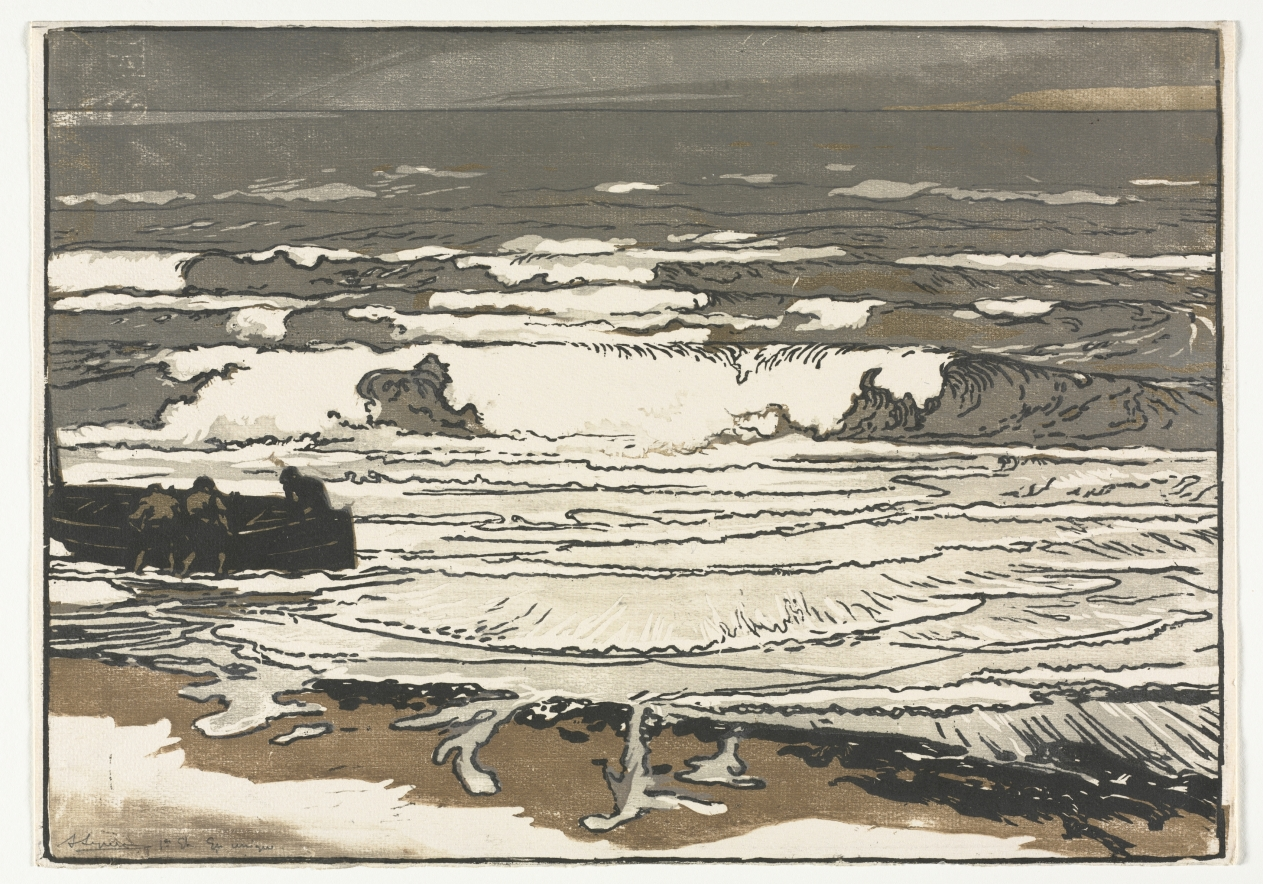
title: The Breaking Waves, Tide of September 1901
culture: France, early 20th Century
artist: Auguste Louis Lepère (French, 1849–1918)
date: 1901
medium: chiaroscuro woodcut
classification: Print